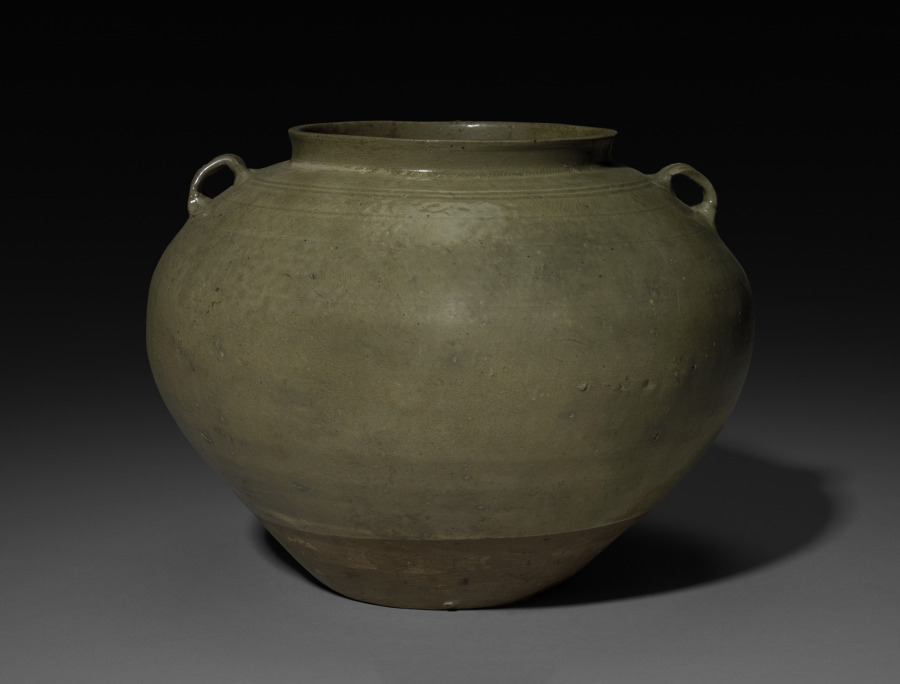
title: Jar with Tiger-Headed Spout: Yue Ware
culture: China, Western Jin dynasty (265-316 CE)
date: late 200s–late 300s CE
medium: glazed stoneware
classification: Ceramic